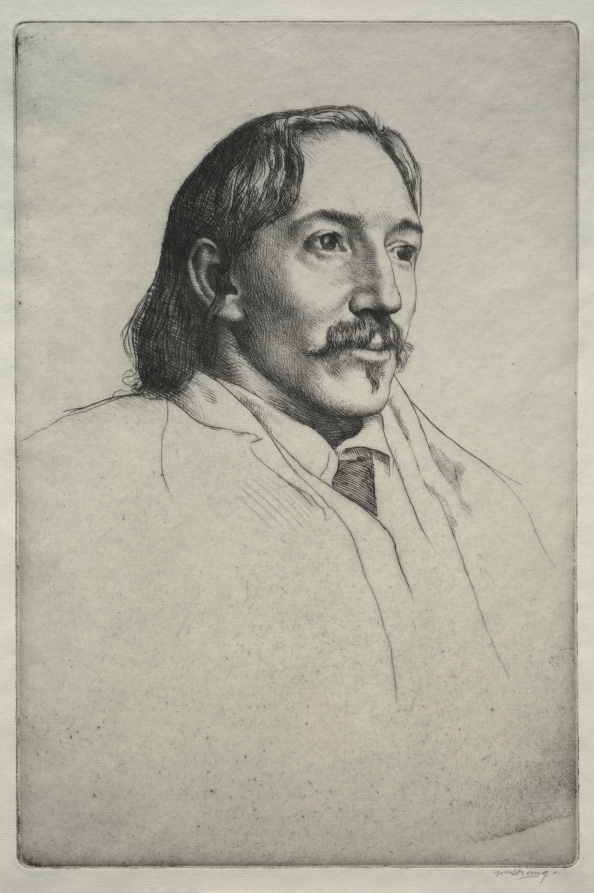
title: Robert Louis Balfour Stevenson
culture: England, late 19th Century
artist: William Strang (British, 1859–1921)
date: 1893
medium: etching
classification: Print